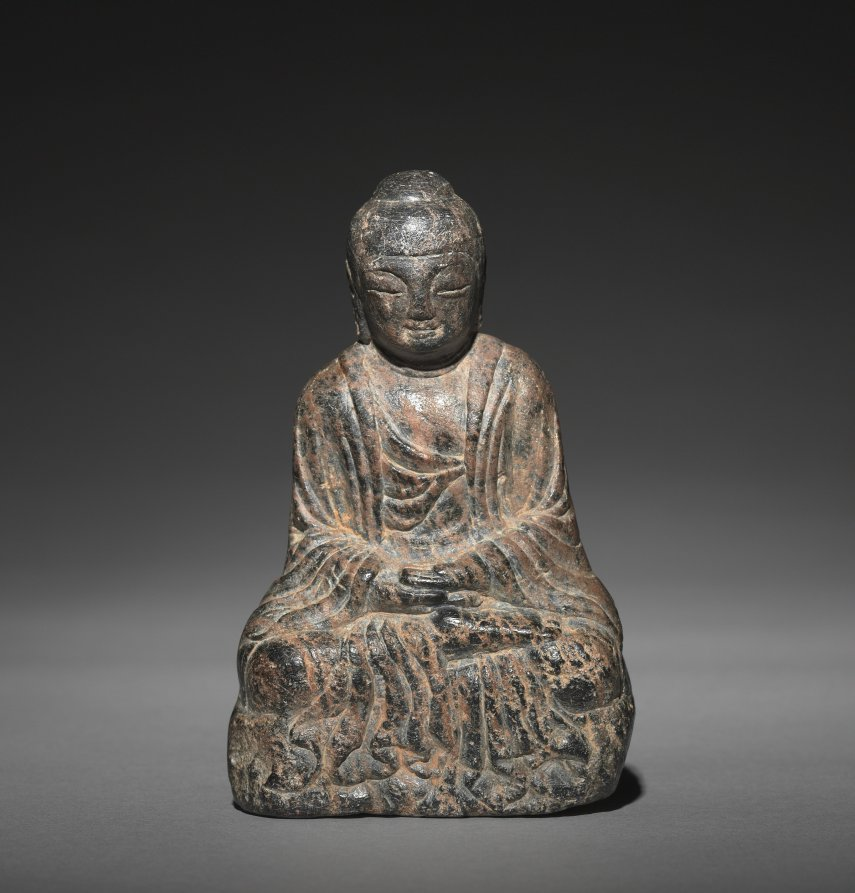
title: Seated Sakyamuni Buddha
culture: Korea, Three Kingdoms period (57 BCE–668 CE)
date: 500s–600s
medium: stone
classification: Sculpture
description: Created during the Unified Silla period, a high point of the spread of Buddhist teachings, this kind of miniature statue was often used as a portable object of devotion by traveling Buddhist monks. This particular Buddhist statue is very similar in style and size to the one in the collection of the National Museum of Korea. See it in the following link: https://www.museum.go.kr/site/main/relic/search/view?relicId=1926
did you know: This seated Buddhist deity is Shakyamuni, the founder of Buddhism.